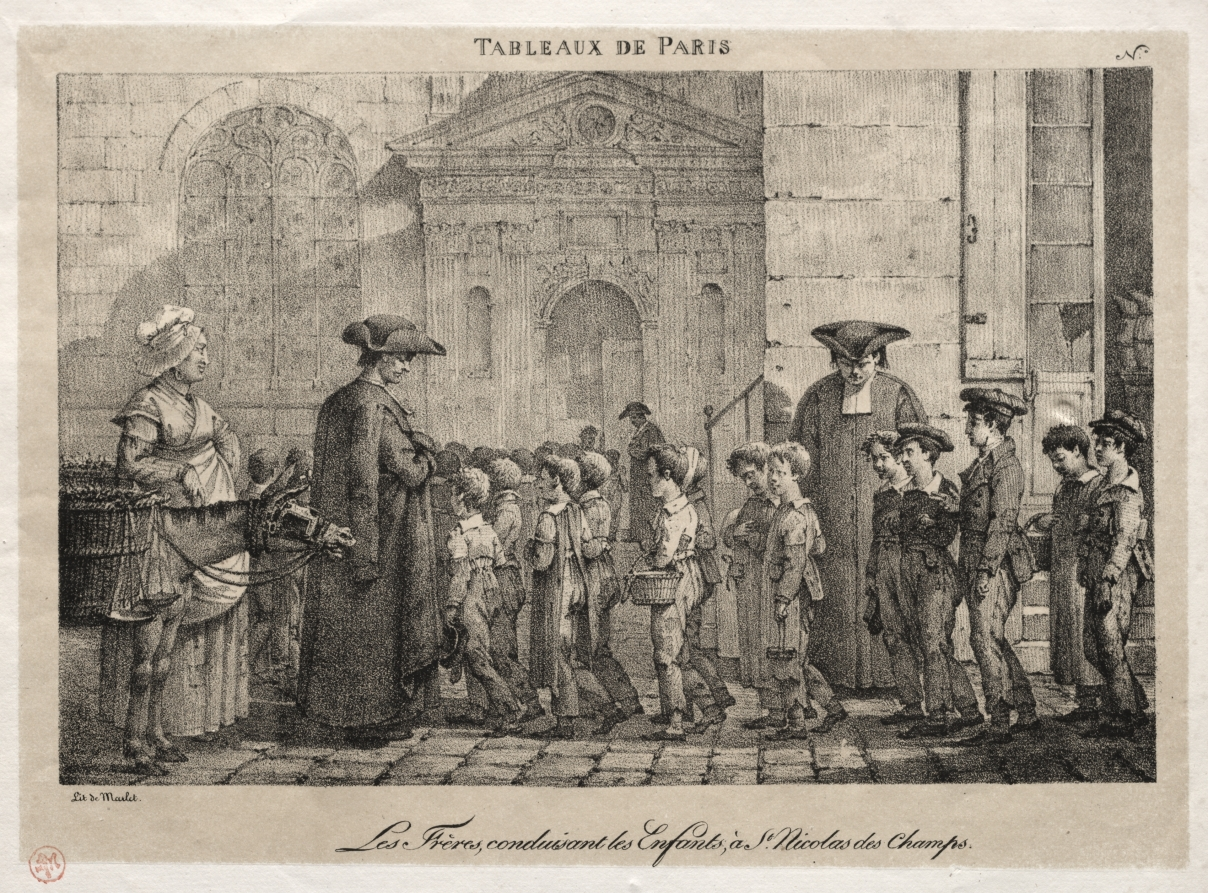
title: The Brothers Conducting the Children to St. Nicholas of the Fields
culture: France, 19th century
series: Scenes of Paris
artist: Jean Henri Marlet (French, 1770–1847)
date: 1820s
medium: lithograph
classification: Print